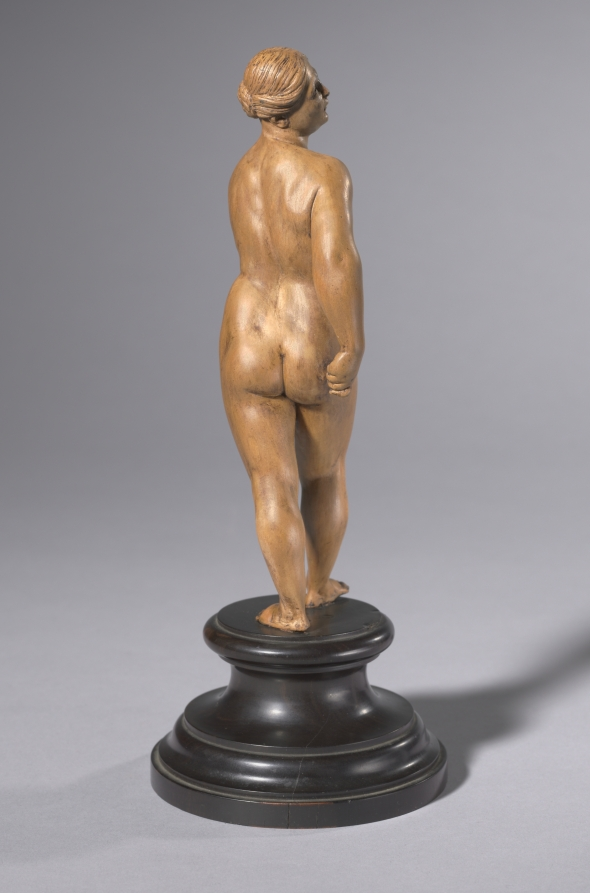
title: Eve Expelled from Paradise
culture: Germany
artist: Leonhard Kern (German, 1588–1662)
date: c. 1640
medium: wood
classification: Sculpture